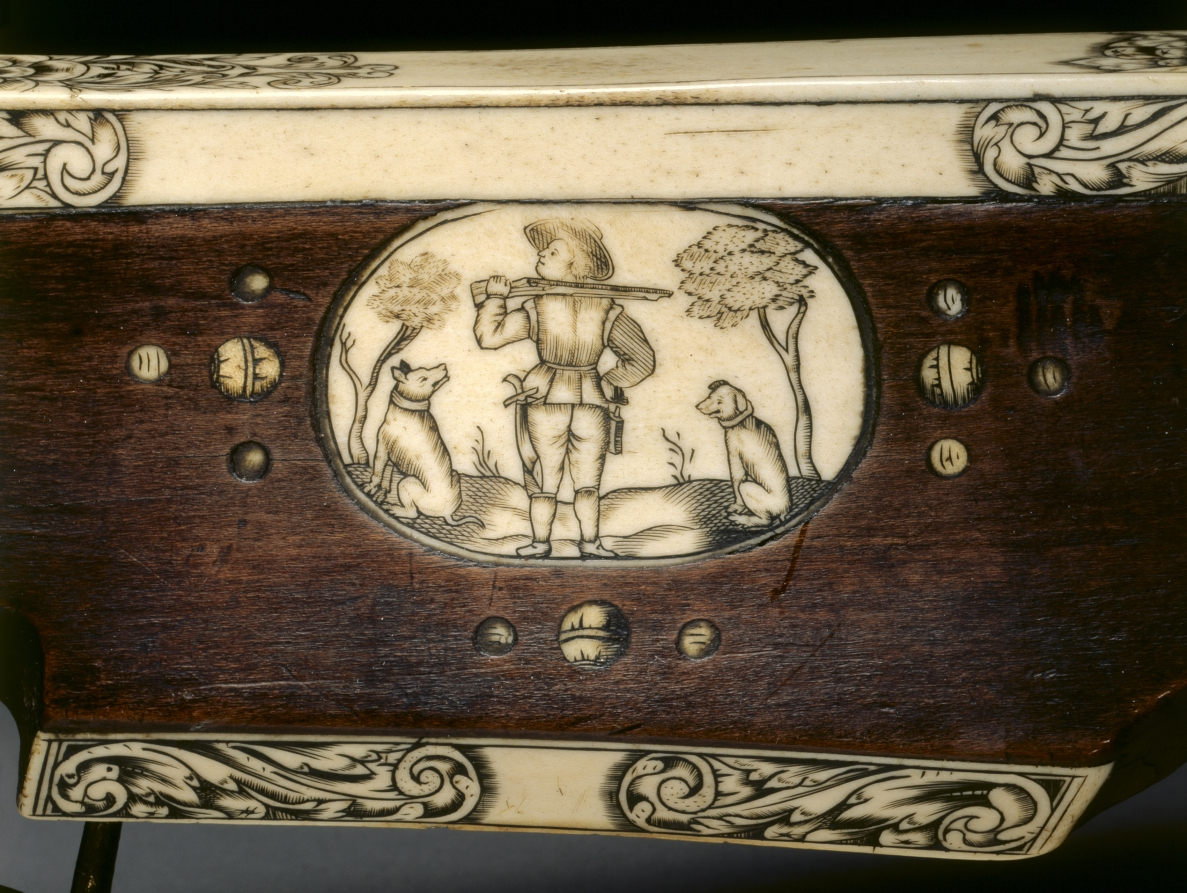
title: Pellet Crossbow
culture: Germany (?)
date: 1600s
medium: wood, inlaid with stag horn; flax cord; steel with traces of paint and gilding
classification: Arms and Armor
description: This ornate pellet crossbow is designed to fire molded clay pellets or small rocks, giving it the name stonebow. The bow is hand drawn and used for hunting small game.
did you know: This is a custom-made crossbow combining popular Italian and German designs of the 1600s.